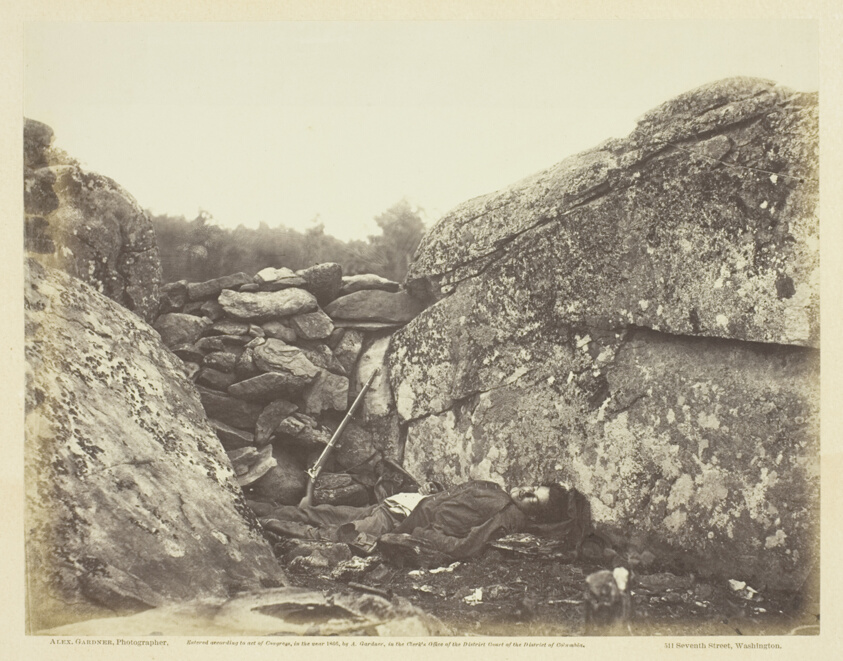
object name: Photograph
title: Home of a Rebel Sharpshooter, Gettysburg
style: 19th century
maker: Alexander Gardner (American, born Scotland, 1821–1882)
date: July 1863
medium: Albumen print, pl. 41 from the album "Gardner's Photographic Sketch Book of the War, vol. 1" (1866)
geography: United States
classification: photograph; albumen silver print; photography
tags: Collected by Hugh Edwards, Gardner's Photographic Sketch Book